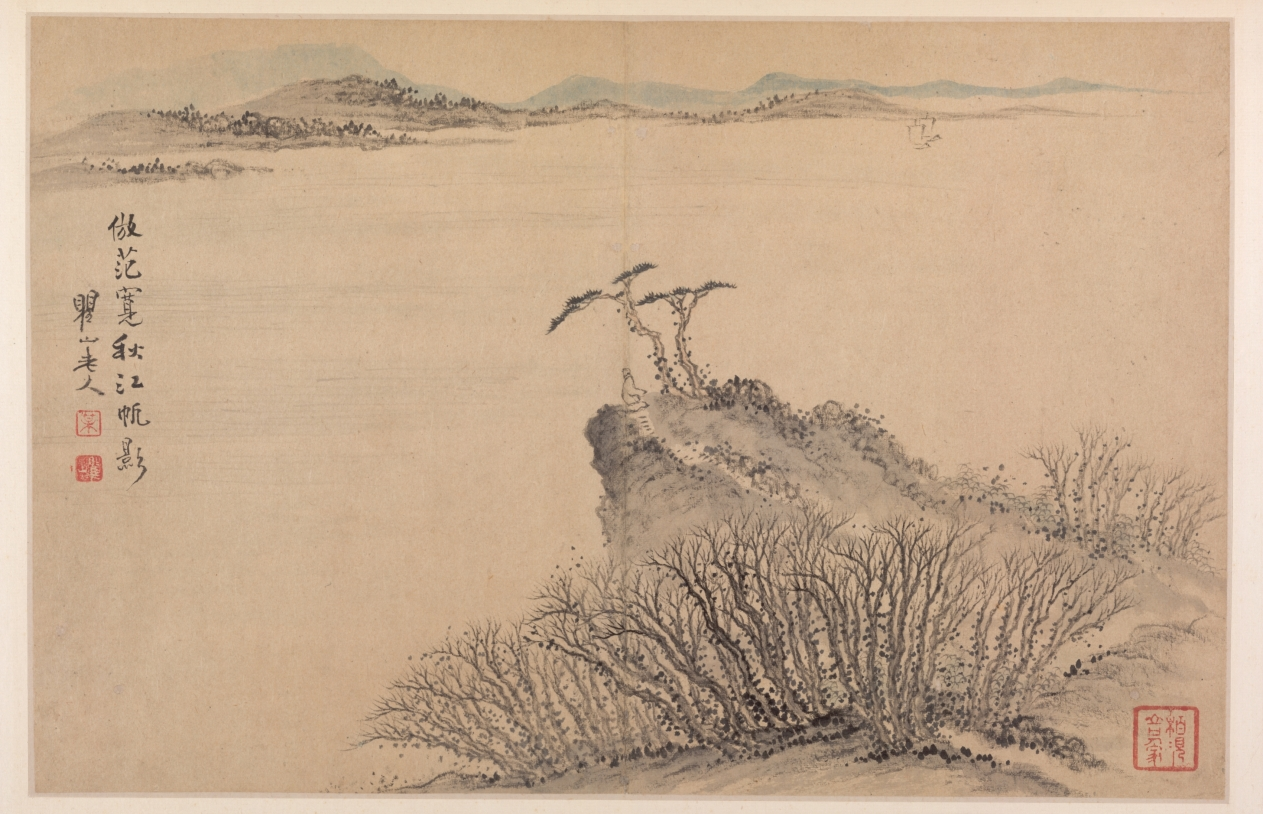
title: Landscapes in Various Styles after Old Masters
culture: China, Qing dynasty (1644-1911)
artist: Mei Qing (Chinese, 1623–1697)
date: 1690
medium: album leaf: ink and color on paper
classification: Painting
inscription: Autumn Leaf III (formerly Leaf H). Artist's inscription, signature, and seal: Imitating Fan Kuan's "Sailing on the Autumn River." Qushan laoren [2 seals] Mei; Qushan [seal, lower right corner] Bo jian shan kou ren jia.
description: This leaf presents a rising promontory in the near distance, whose base is hidden by a dense grove of barren, autumnal trees. A gentle incline emerges from the lower right, with a small path leading to its summit, where a gentleman is sheltered from the wind by two pines. This promontory resembles Guangming Ding 光明頂 (Summit of the Bright and Luminous), the second tallest peak in Huangshan 黃山 (Mt. Huang or Yellow Mountain), the scenic area that inspired much of Mei Qing’s artistic production. Instead of looking down on the “Sea of Clouds,” though, as one who scales Huangshan’s peak would, this gentleman is looking out at two boats on an actual sea.